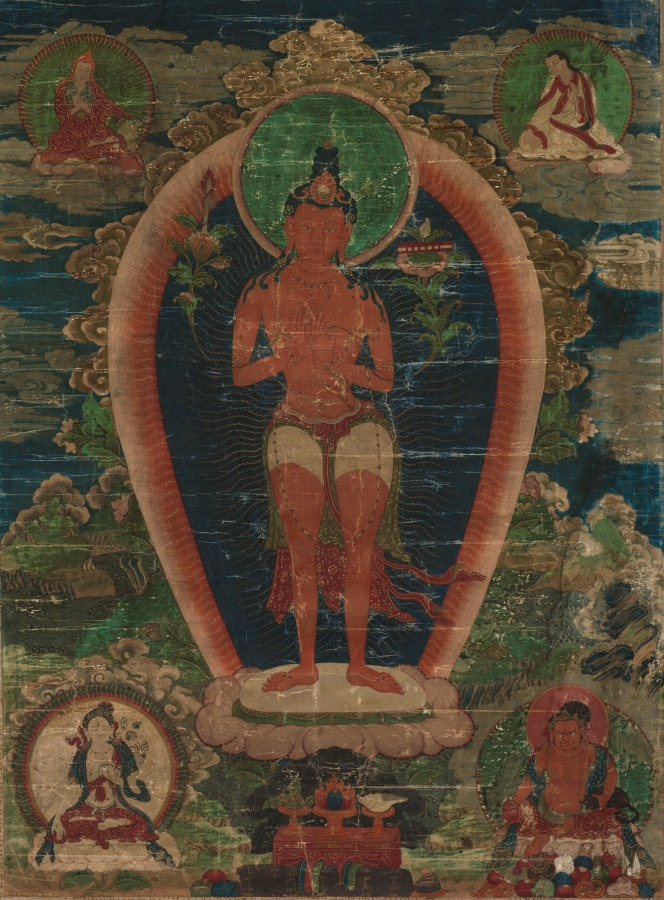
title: Bodhisattva Padmapani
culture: Tibet, 18th century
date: early 1700s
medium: ink and slight color on cotton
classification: Painting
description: a